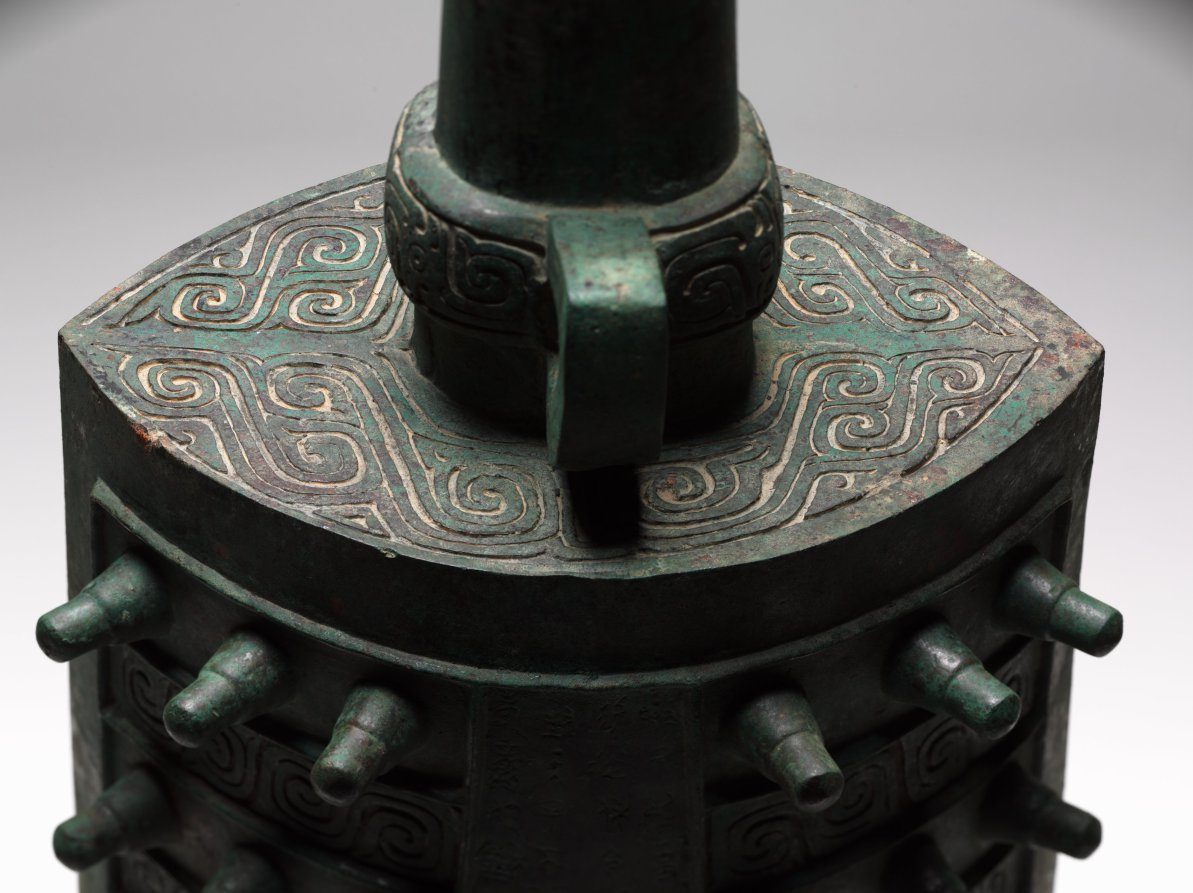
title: Bell (Lai Zhong)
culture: China, Shaanxi province, Meixian, Western Zhou dynasty (c. 1046–771 BCE)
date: c. 800–700 BCE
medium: bronze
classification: Metalwork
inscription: Lai proclaimed: "Great and illustrious was my august late father who made his heart clean following the disciplined virtue of his forefathers and dutifully served the past king. I, Lai, now succeed him in service and dare not fail. Respectfully, from dawn to dusk I will earnestly--even unto death--serve the Son of Heaven, taking as a model the obligation of my forefathers." I, Lai, was presented with many things. Then came the [king's] gracious command: "Manage the fisheries and forests of the realm." "I, Lai, dare to respond to the great, illustrious, sagely, and gracious favor of the Son of Heaven, extolling him and using this as cause to make for my august late father Gongshu a set of harmonized bells. Ding, dong, bing, bong, ding, dong, bing, bong. May they be used in acts of piety, reverently gladdening past luminaries. May the past luminaries who dwell on high help perpetuate this command, sending down upon me good fortune, tranquility, and purity. May I, Lai, live long in service to the Son of Heaven." May sons' sons and grandsons' grandsons forever treasure these [bells].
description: In ancient China, music and ritual had political significance and were linked inseparably to the power of states. During the Zhou dynasty, bronze bells were made in sets of eight to sixty bells. This bell is the second largest from a set of eight. This bell bears an inscription of 118 characters about its owner, Lai, and why it was cast. Lai's ancestors dutifully served the Western Zhou royal court, and he was granted a hereditary position by the "Son of Heaven" (the ruler). To express filial piety, Lai commissioned a set of bells as an offering to his father, Gongshu, in the hope that they would be forever treasured by future generations. This important inscription also provides an early example of Chinese calligraphy highlighting the purely abstract lines and construction of characters.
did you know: The technical sophistication of the unusual lens-shaped cavity allowed the bell to produce two different tones.